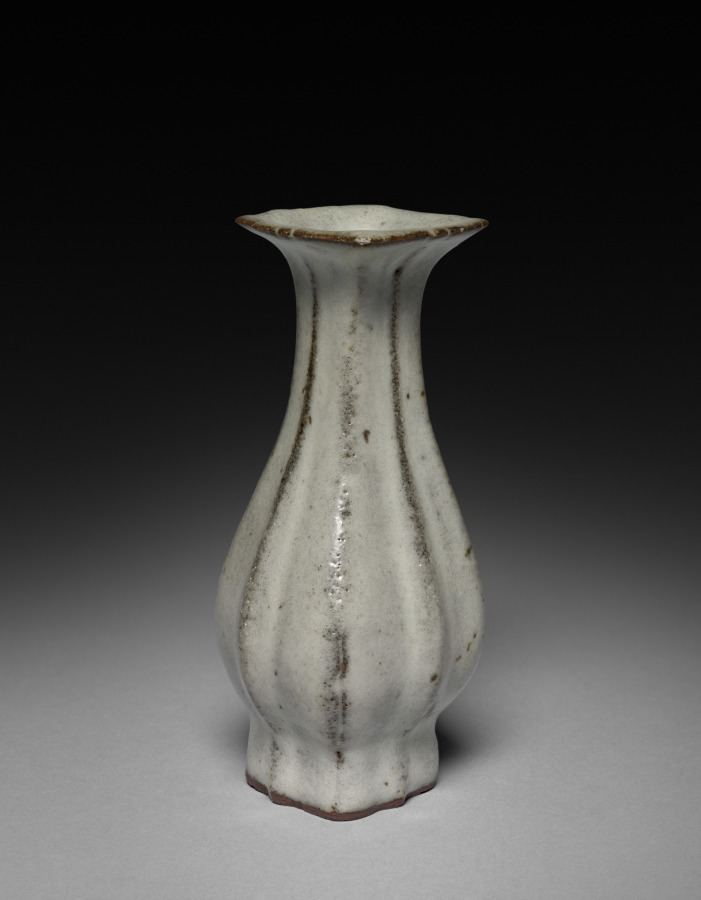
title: Lobed Vase: Guan ware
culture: China, Hangzhou, Suburban Altar Kiln, Southern Song dynasty (1127-1279)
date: 1127–1279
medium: glazed reddish-brown porcelain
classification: Ceramic